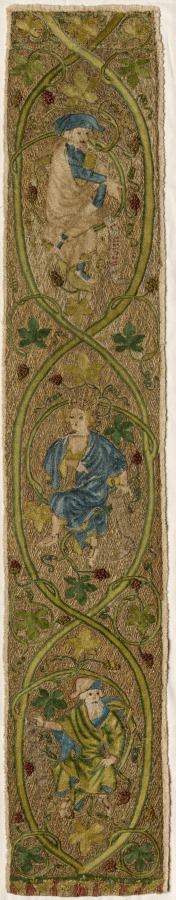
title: Orphrey Band: The Tree of Jesse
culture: England, 14th century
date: c. 1350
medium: Silk, gold and silver thread, linen; embroidery: split and couching stitches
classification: Embroidery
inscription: three figures framed by a scrolling vine dressed in medieval costumes hold scrolls on which their names are written in Latin; they read from top to bottom: Achim, Ezechias-Rex, and Eloud.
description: From the 1100s to the 1300s in London, both men and women worked as professional embroiderers. Here, the Tree of Jesse, a favorite medieval theme illustrating the ancestry of Christ, appears as a grapevine with three ancestors—Achim, Ezechias, and Eliud—seated on tendrils. Painters often provided embroiderers with designs, revealing a close relationship between the professions.